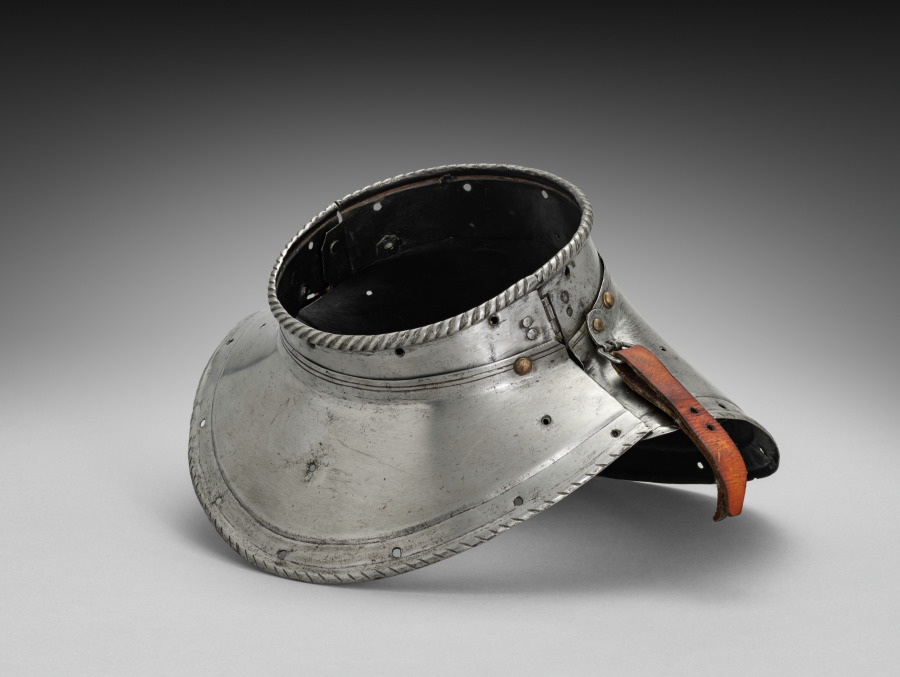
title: Colletin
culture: Germany, 19th century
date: 1801–1900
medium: steel with black paint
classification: Arms and Armor